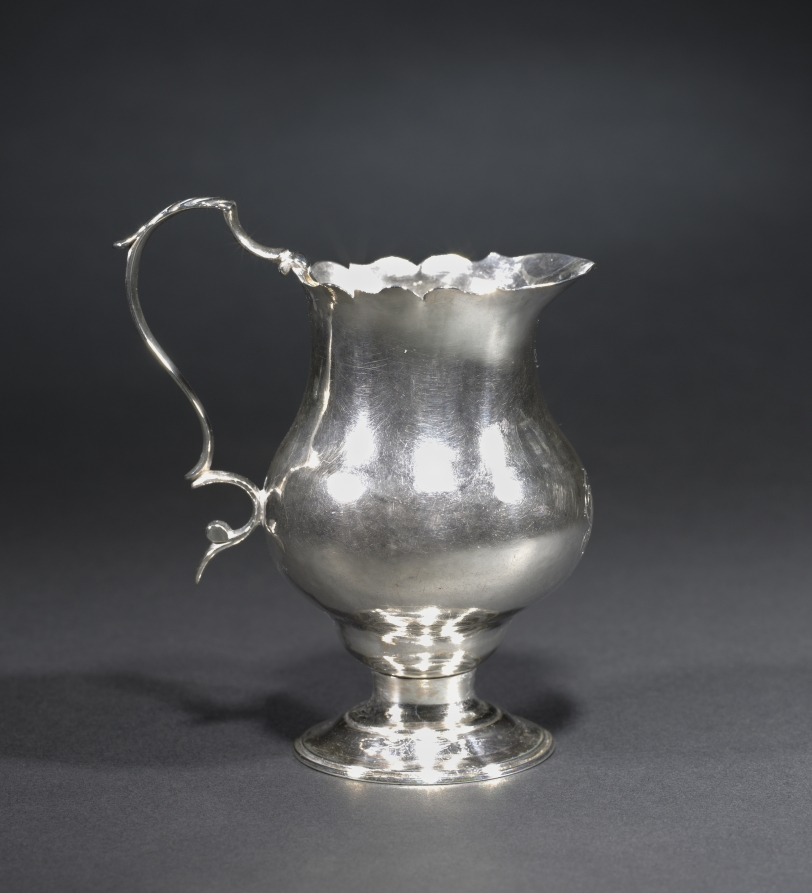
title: Cream Pitcher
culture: America, Massachusetts, Boston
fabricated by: Paul Revere II (American, 1735–1818)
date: c. 1765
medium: silver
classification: Silver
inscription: "P . . .H/to/P . . .E" in block letters under foot, and "MHP" in bright-cut script on front, opposite handle.